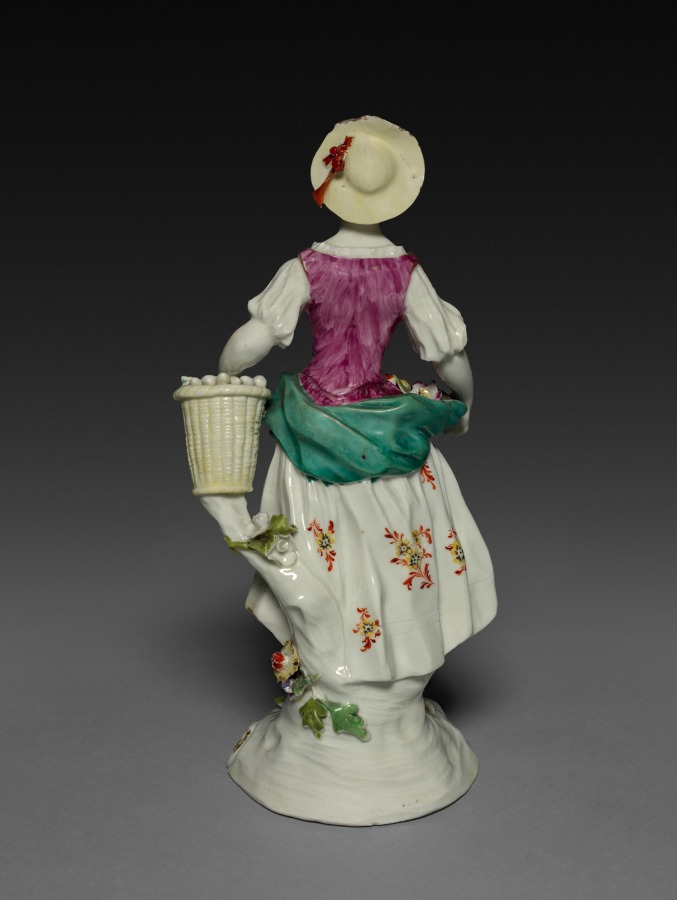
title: Farmer's Wife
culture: England, Derby, mid-18th century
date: 1760–1765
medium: soft-paste porcelain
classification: Ceramic